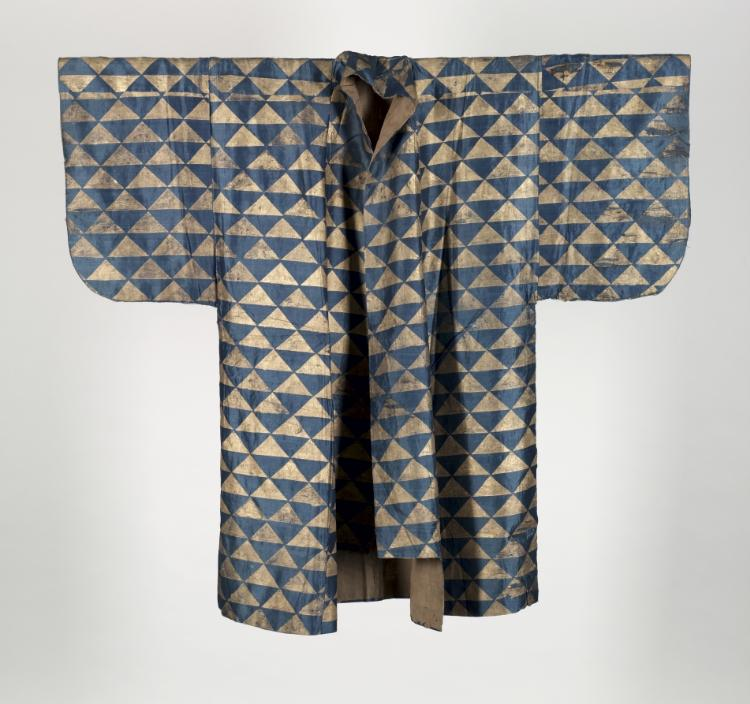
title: Noh Costume (Surihaku) with Fish-Scale Pattern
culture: Japan, Edo period (1615–1868)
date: 1800–1850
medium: plain weave silk; metal thread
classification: Garment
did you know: Surihaku means patterns of gold or silver leaf affixed with paste to a plain-colored background.